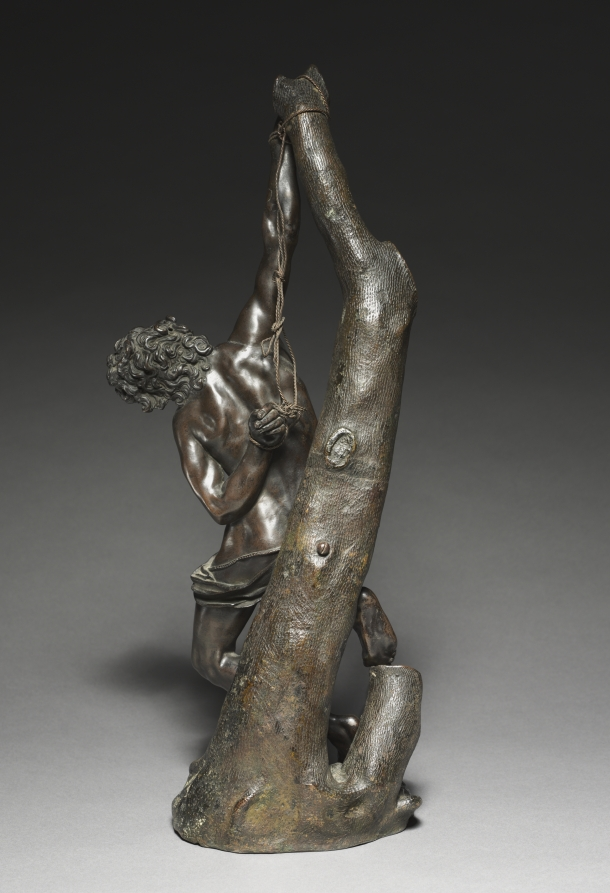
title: Saint Sebastian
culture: Germany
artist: cast after a model probably by Georg Petel (German, c. 1601-c. 1634)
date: 1620s or later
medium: bronze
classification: Sculpture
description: This composition is the subject of an ongoing attribution debate. The design is adapted from a painting by Adam Elsheimer, a German artist working Rome. This sculptural model exists in many versions; however, they vary considerably in their execution, complicating the identification, because they were clearly not made by a single sculptor or workshop. However, Georg Petel probably first created the design as he traveled across Italy in 1620–24, where his portrait was painted holding this composition.